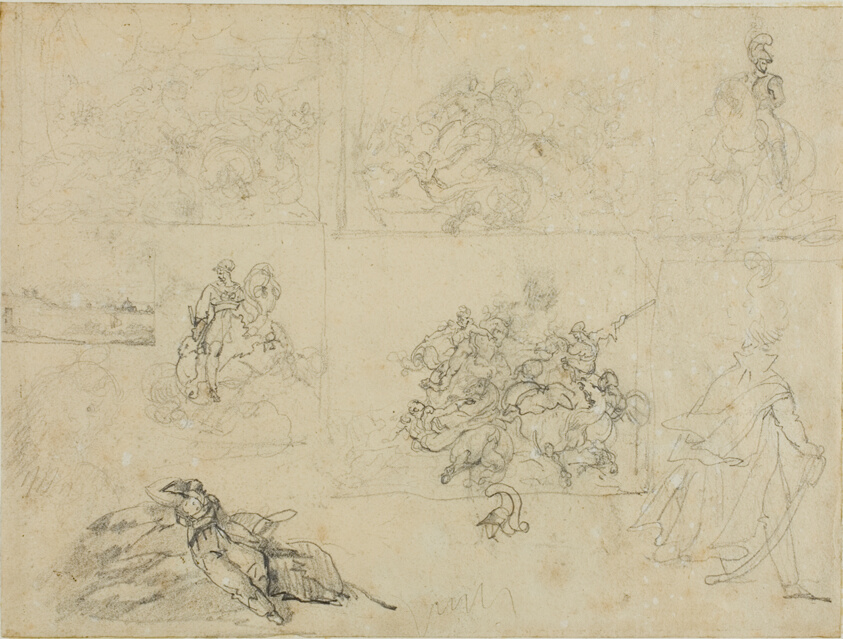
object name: Drawing and Watercolor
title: Sketches of A Cavalry Battle, Soldiers, and a Landscape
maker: Jean Louis André Théodore Géricault (French, 1791-1824)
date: 1813/14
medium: Graphite on cream wove paper, perimeter mounted on cream wove paper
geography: France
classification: graphite; drawings (visual works); prints and drawing